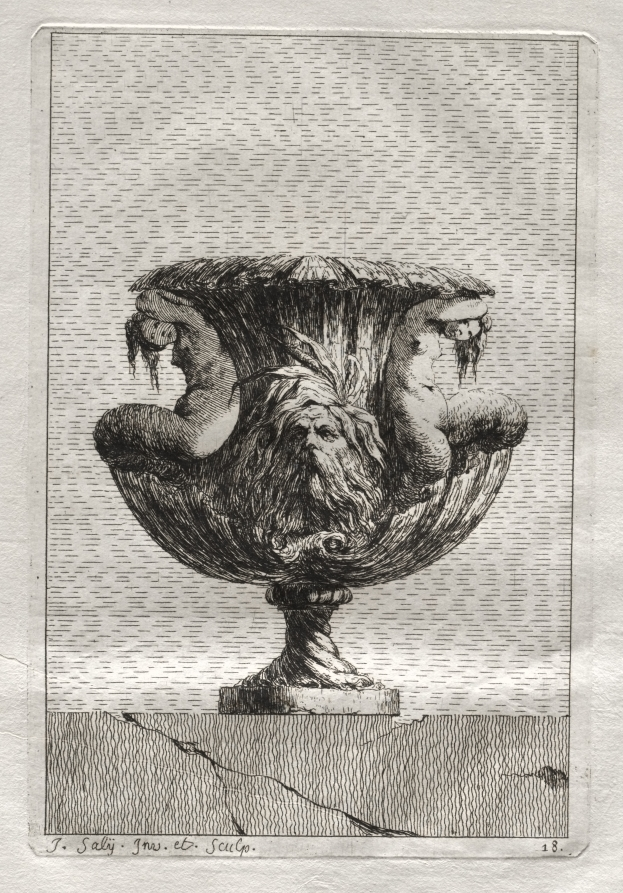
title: Suite of Vases: Plate 18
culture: France, 18th century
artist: Jacques François Saly (French, 1717–1776)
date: 1746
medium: etching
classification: Print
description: Designing ornamental vases or urns was particularly popular during the mid-18th century since the only limit to the possibilities was the imagination of the artist. Saly, a sculptor by training, was a student at the French Academy in Rome from 1740 to 1746, at which time he published a set of 30 etchings. Saly began with basic antique vase forms but deviated from classical ornament to use a rich variety of fantastic creatures for embellishment.